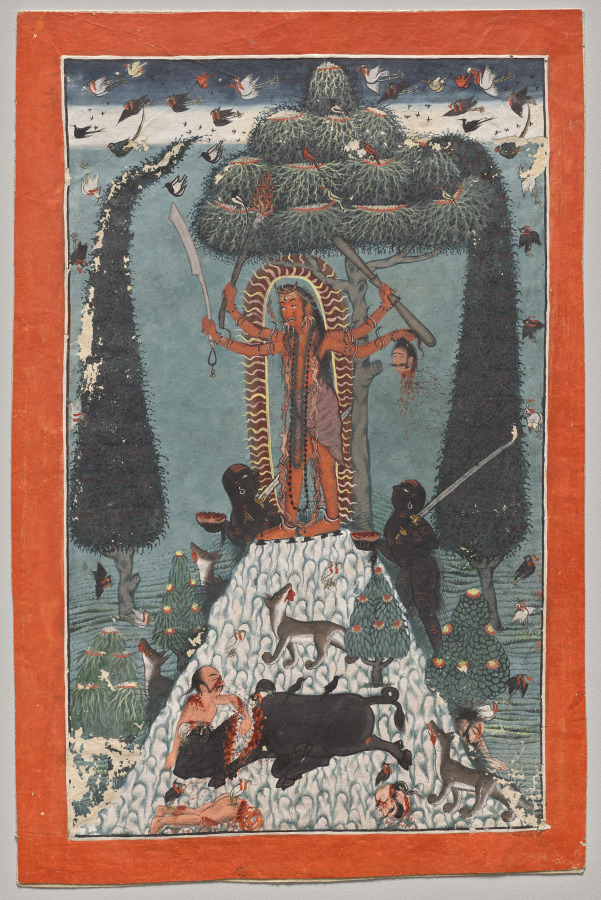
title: Goddess standing on a mountaintop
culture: Northern India, Pahari kingdoms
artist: attributed to Master of the court of Mandi (Indian)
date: c. 1720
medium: Gum tempera and gold on paper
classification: Painting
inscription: 67. 30. 83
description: The four-armed goddess, whose name remains unknown, presides over a scene of carnage. Two dark-skinned women offer halved heads full of blood. A buffalo that stands for her devotees’ enemies has been sacrificed. Jackals and birds of prey cheerfully take away shares of flesh. An important aspect of religious practice in the northwest Himalayas, the worship of fierce goddesses was thought to aid their devotees in conquering enemies, psychological and otherwise. She wears the enemies as corpses in her ears and as a garland around her neck.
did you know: The Goddess is wearing a garland of corpses.